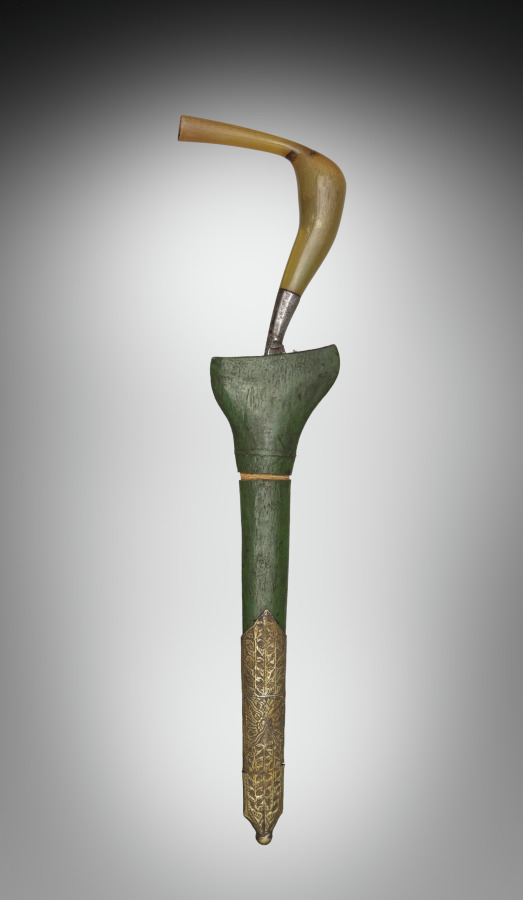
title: Dagger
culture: Java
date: 1800s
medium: iron with horn handle and wood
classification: Arms and Armor